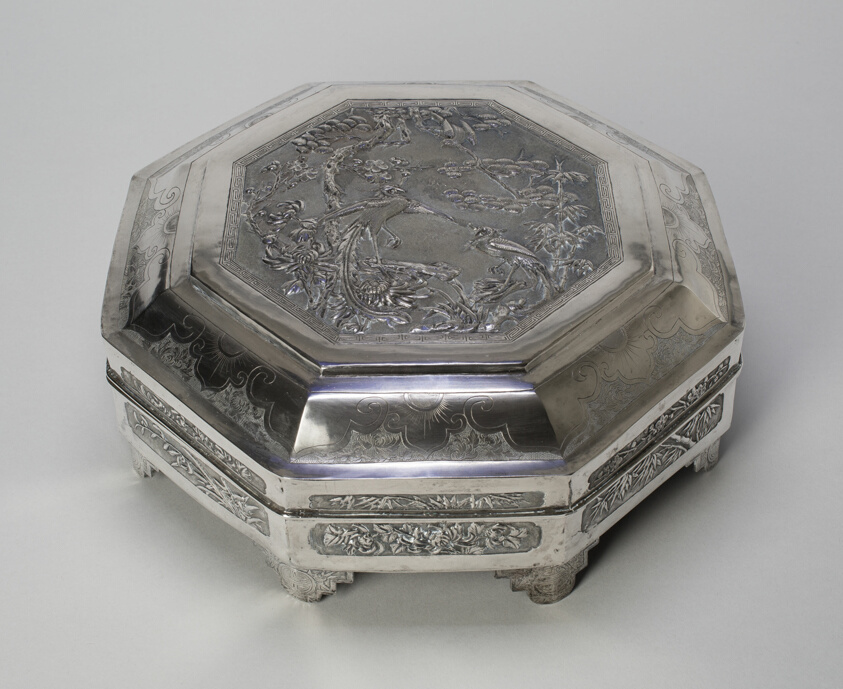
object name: Vessel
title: Hexagonal Covered Box with Birds and Flowers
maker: China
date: Qing dynasty (1644–1911), Kangxi reign mark and period (1662–1723)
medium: Silver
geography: China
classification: silver; metal; vessel; asian art